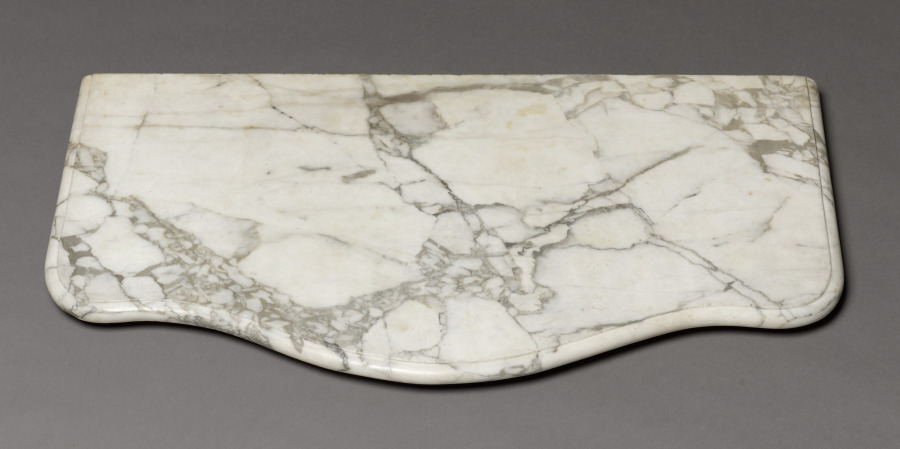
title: Console Table (table top)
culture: France, 18th century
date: c. 1720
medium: marble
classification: Furniture and woodwork